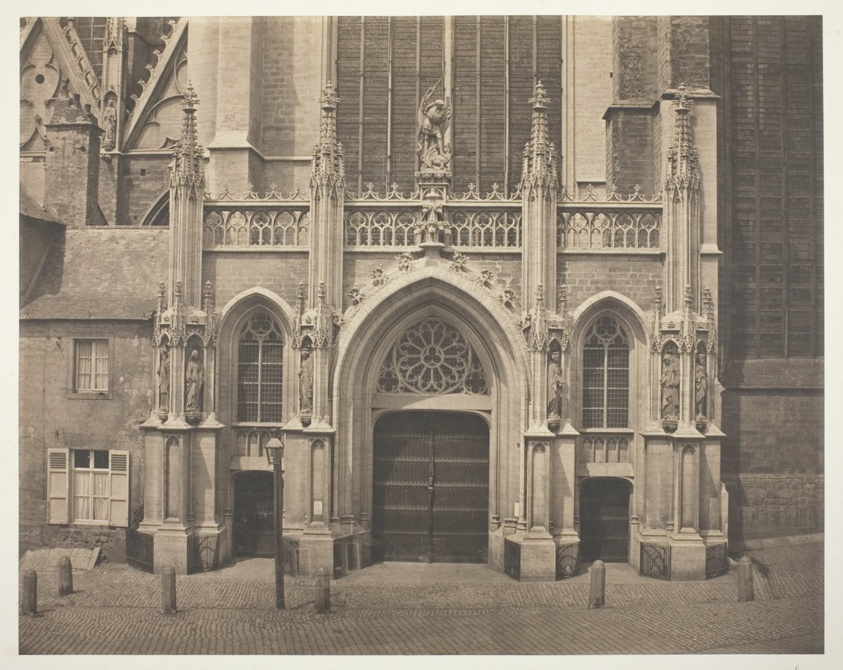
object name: Photograph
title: Untitled [South Façade of the Transept of St Michael’s and St Gudula Cathedral in Brussels, Belgium]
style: 19th century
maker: Bisson Frères (Louis-Auguste Bisson, French, 1814–1876 and; Auguste-Rosalie Bisson, French, 1826–1900)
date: 1854/55, printed 1855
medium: Albumen print, from the album "Reproductions photographiques des plus beaux types d’architecture et de sculpture"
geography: France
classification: albumen silver print; photographic process; photography; photograph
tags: Collected by Hugh Edwards, architecture